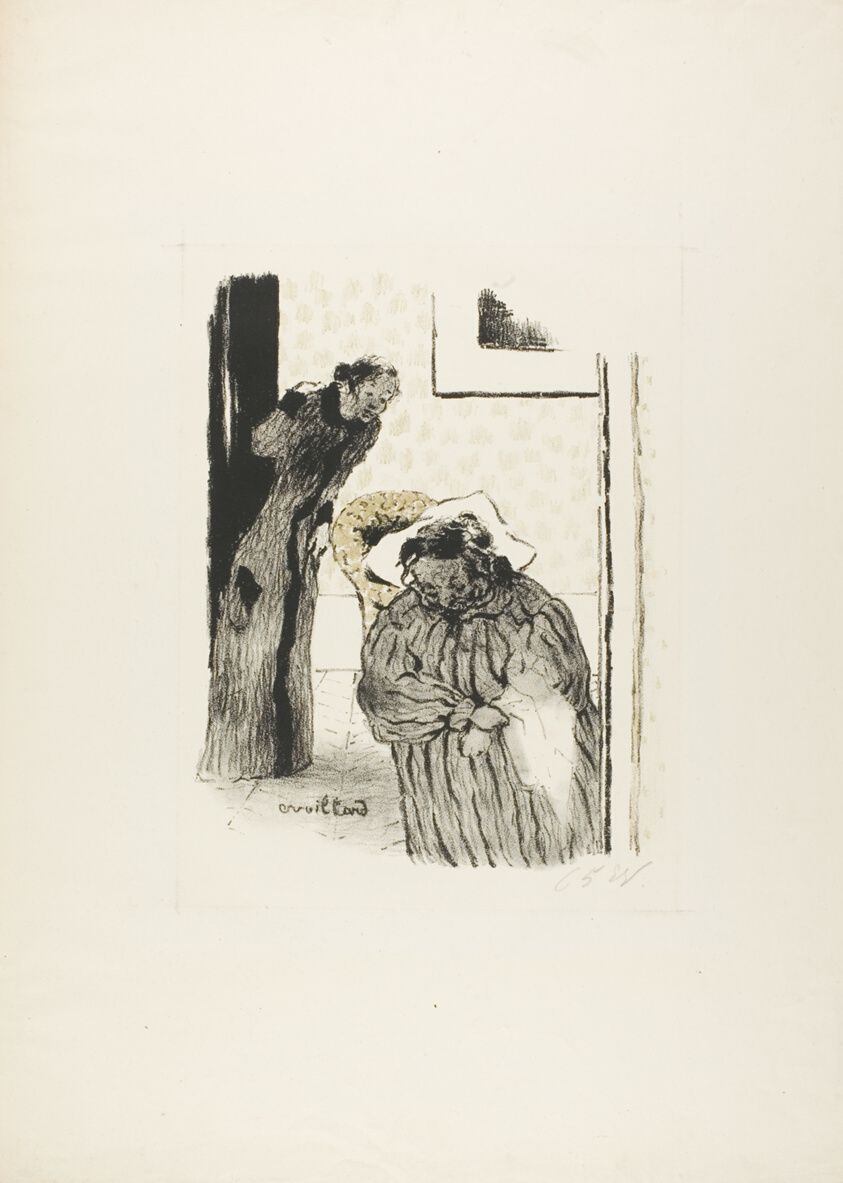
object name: Print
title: Siesta, from the first album of L'Estampe originale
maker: Edouard Jean Vuillard; French, 1868-1940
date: 1893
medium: Lithograph from two stones on white wove paper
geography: France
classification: lithograph; print; prints and drawing